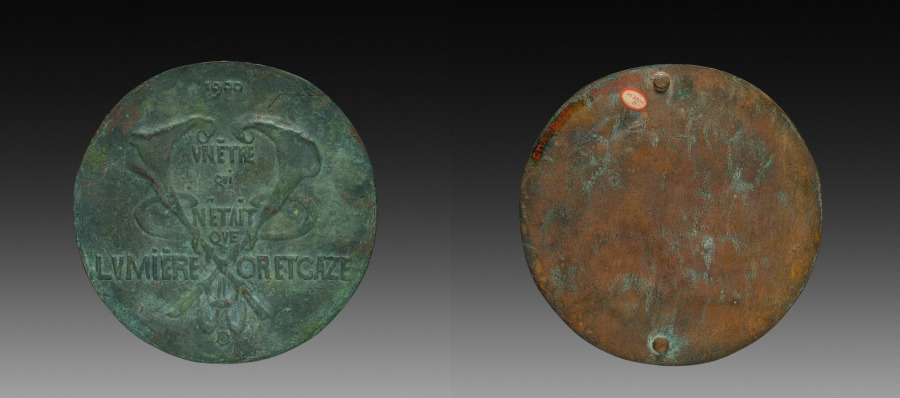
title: Medal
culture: France, 20th century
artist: Pierre Roche (French, 1855–1922)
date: 1900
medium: bronze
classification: Metalwork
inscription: "-Fuller-/Loïe."